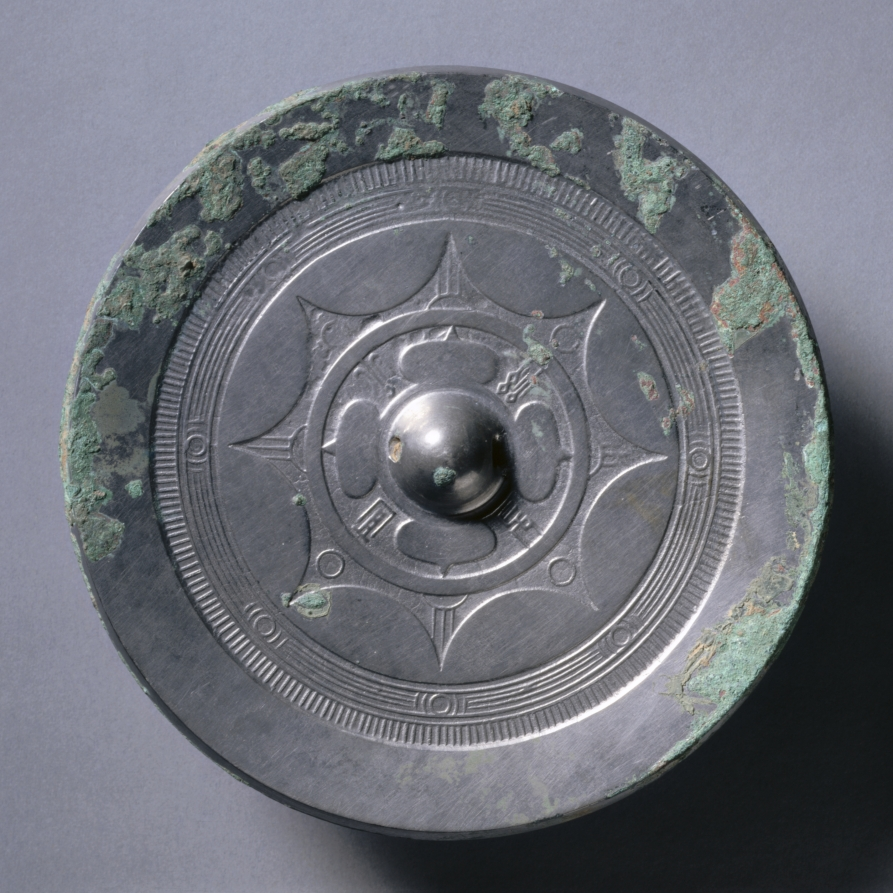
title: Mirror with Quatrefoil, Concentric Circles, and Linked Arcs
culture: China, Eastern Han dynasty (25–220 CE)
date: 25–220 CE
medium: bronze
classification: Metalwork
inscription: May [the mirror] be cherished by your sons and grandsons for a long time.